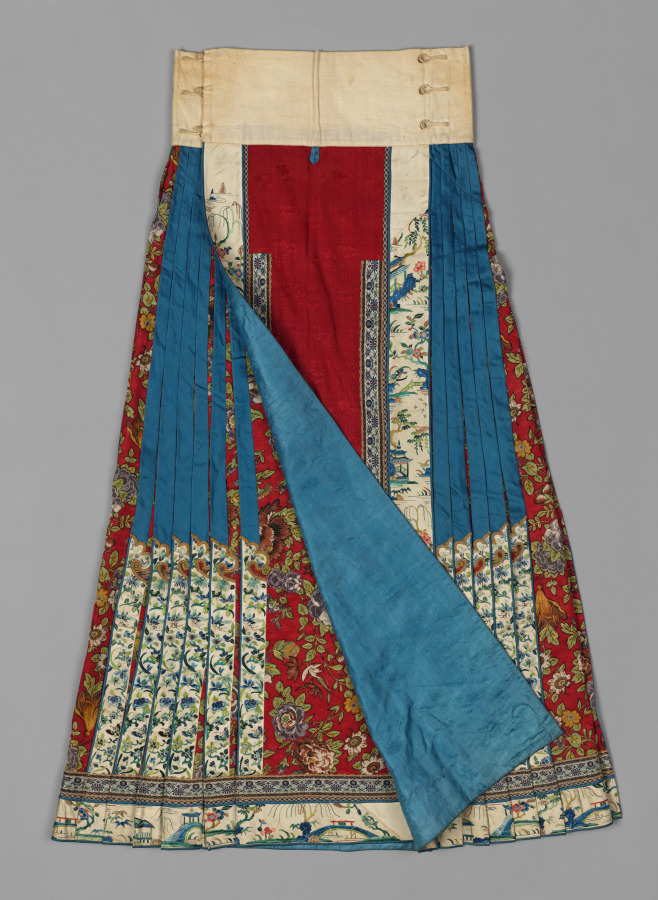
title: Skirt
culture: China, Qing dynasty (1644-1911)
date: 1800s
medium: Silk, cotton: embroidery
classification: Garment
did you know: This skirt includes both embroidered sections and polychrome printed fabric.